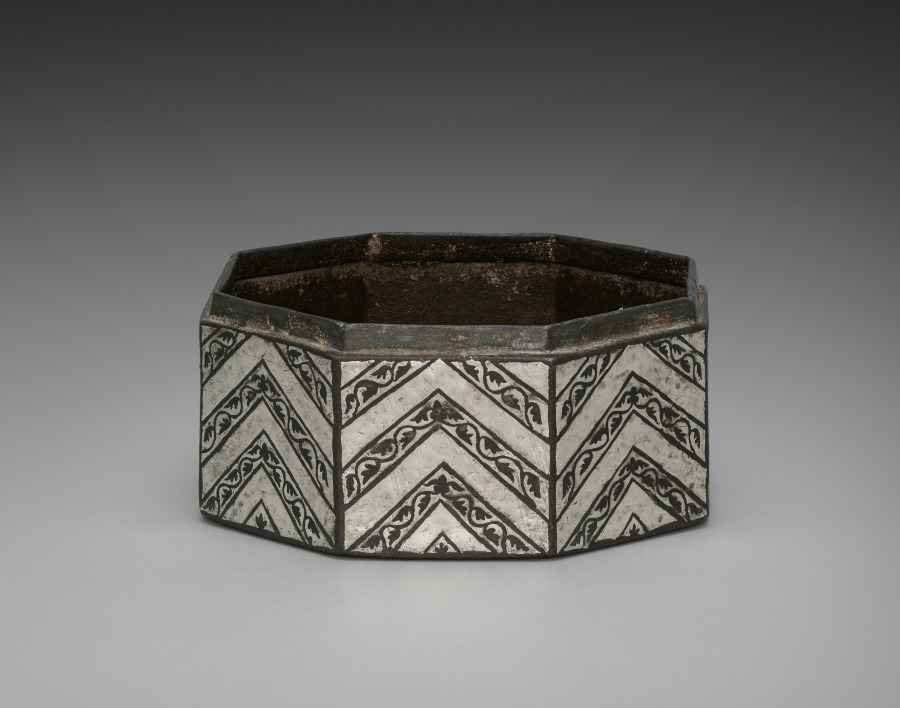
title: Bidri Pandan with Chevrons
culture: Southwestern India, Deccan, Karnataka, Bidar​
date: c. 1700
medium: Zinc alloy with silver overlay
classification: Metalwork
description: A pandan is a lidded vessel for serving paan, which has been enjoyed in India for more than two thousand years. Paan is betel or areca nut mixed with lime powder, aromatics such as clove cinnamon, or cardamom, and wrapped in betel leaf. The whole packet is chewed after a meal as a mild stimulant and mouth freshener.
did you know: The lime powder in paan functioned as an ancient antacid after meals.